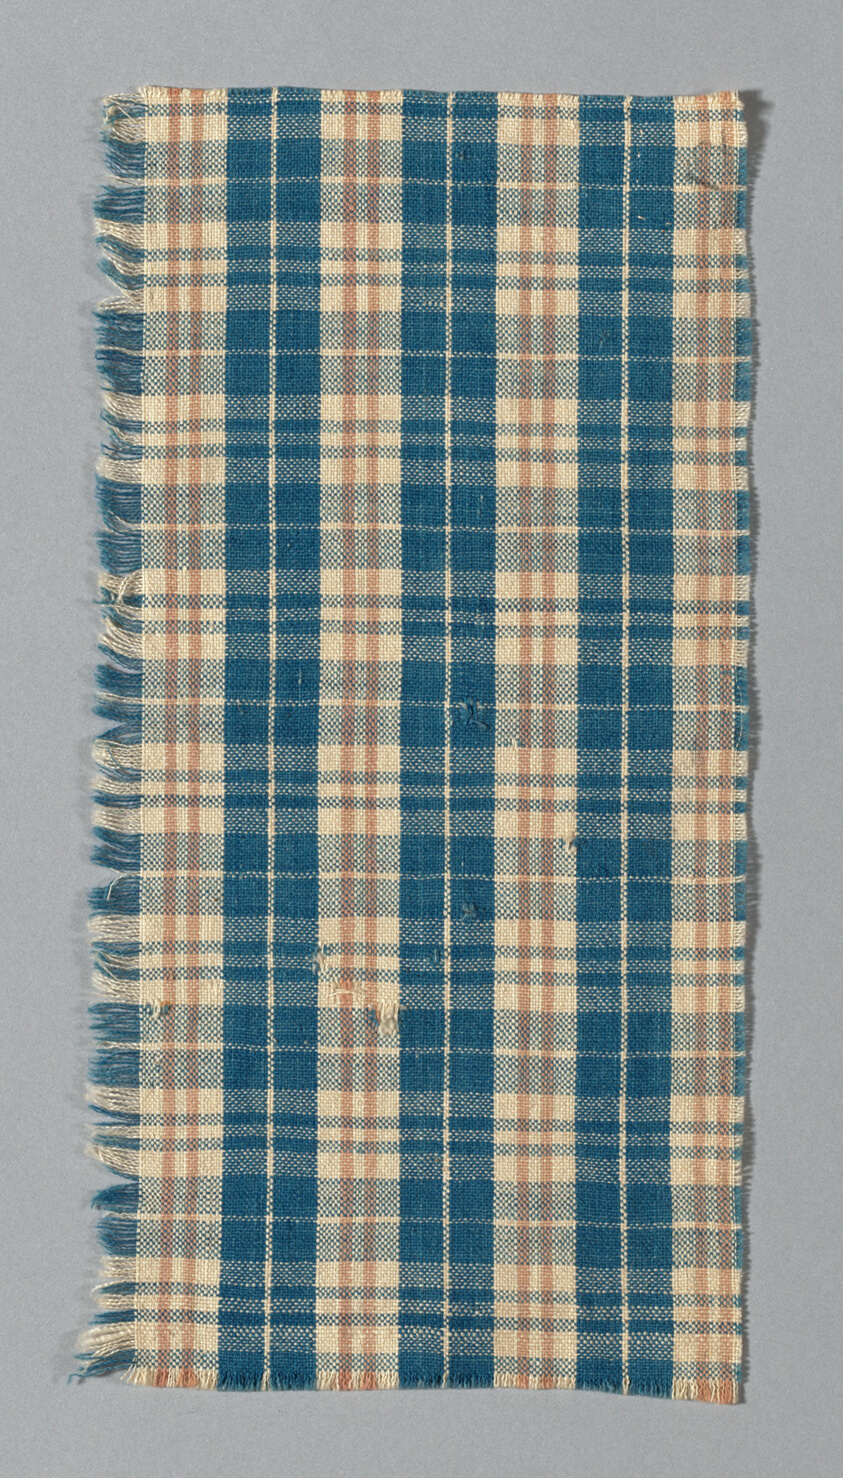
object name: Textile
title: Fragment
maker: United States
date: early 19th century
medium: Sample of stripe and check patterns of blue, white and tan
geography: United States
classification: textile; weaving